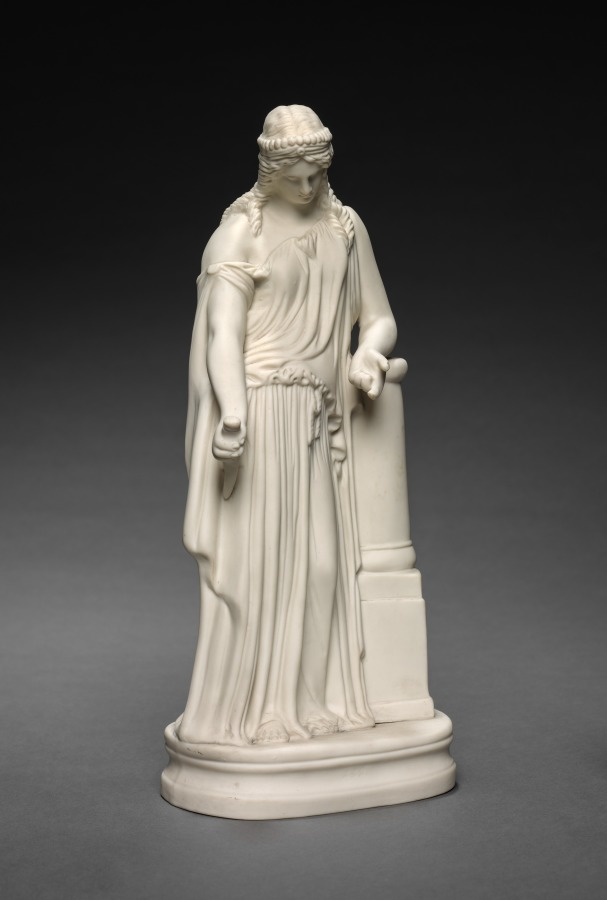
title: Figure of Medea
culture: England, 19th century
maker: W. T. Copeland & Sons (British)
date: c. 1870–1890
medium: Parian porcelain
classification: Ceramic